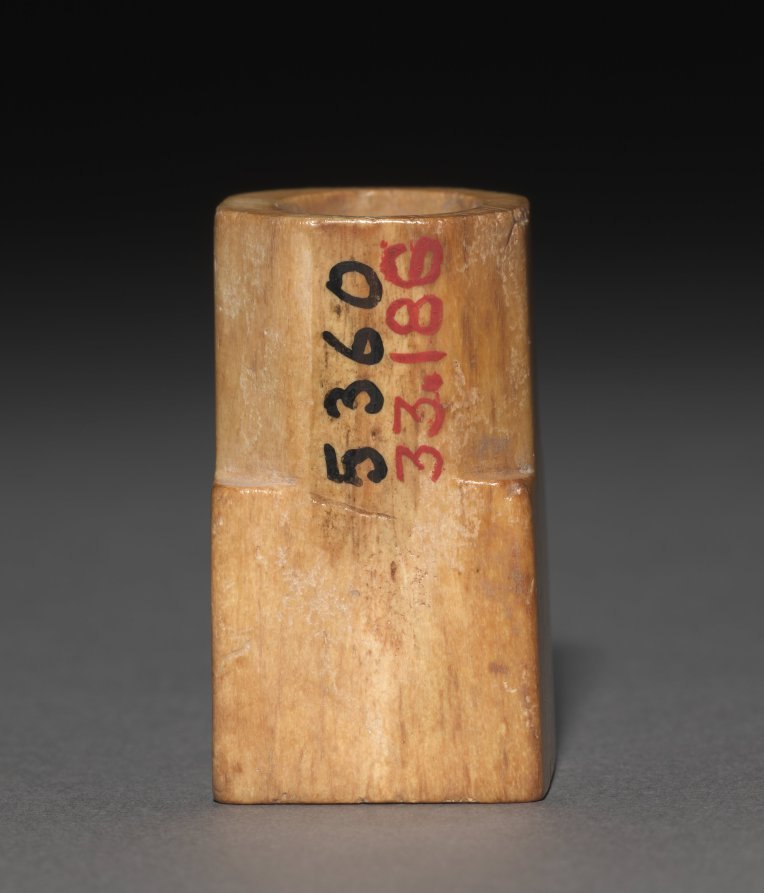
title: Carved Bone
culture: Parthian Empire (247 BCE–224 CE)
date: 1–200 CE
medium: carved bone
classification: Miscellaneous